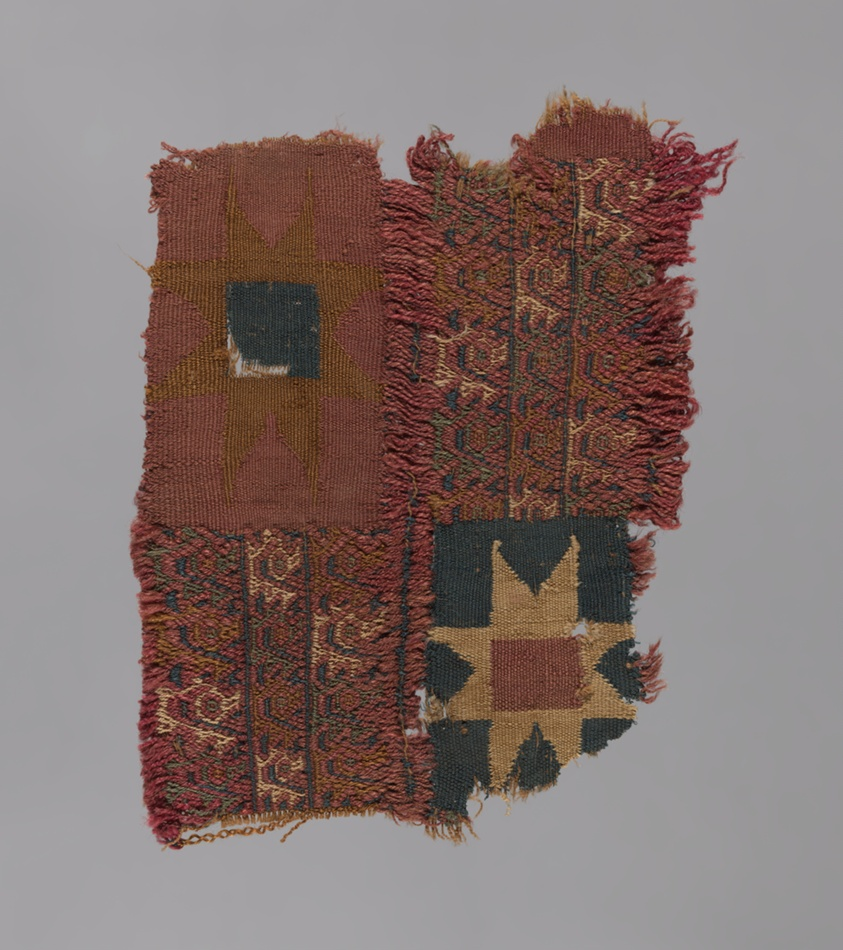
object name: Textile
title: Fragment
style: Chuquibamba, inca, late intermediate period, Pre-Columbian, americas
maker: Chuquibamba (Probably south coast, Peru)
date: A.D. 1476/1532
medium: Wool (camelid), interlocking tapestry weave and complementary weft weave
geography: Peru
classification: textile; weaving